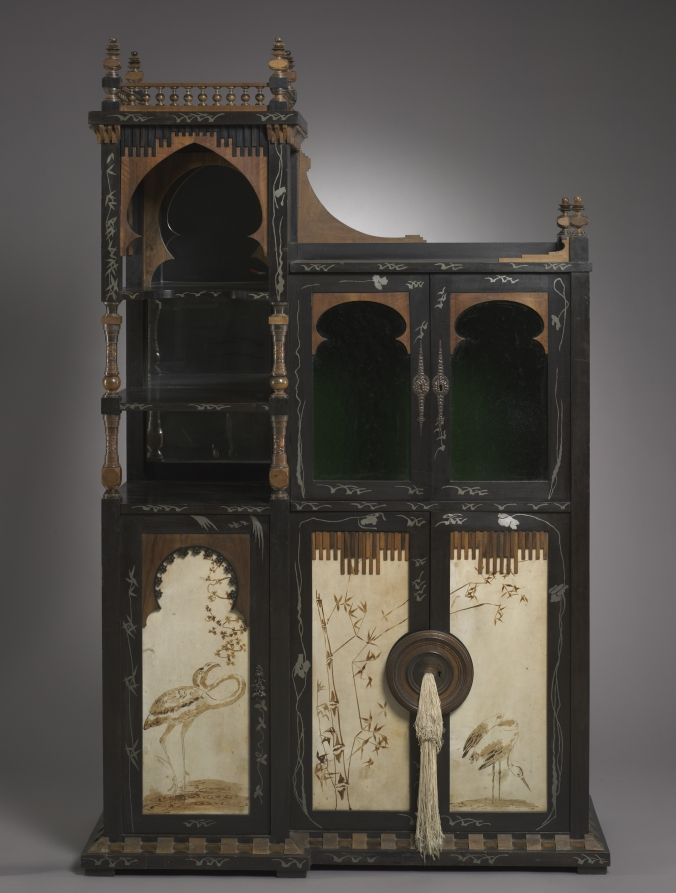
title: Cabinet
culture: France, late 19th Century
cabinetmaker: Carlo Bugatti (Italian, 1856–1940)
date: c. 1895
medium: wood with metal inlays and painted parchment, glass doors and mirror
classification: Furniture and woodwork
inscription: vellum panel on right side at the bottom signed in pseudo Japanese letters: "Casati. (No professional artist of this name has been discovered; may be the work of the society woman, the Marchese Casati.)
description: In both form and decoration this cabinet typifies the work of Carlo Bugatti. Asymmetrical, with a tower-like element at one side, there are Islamic-inspired ornaments throughout its design, notably the onion-shaped arches in the upper half of the cabinet. Japanese influence is also evident in the white metal inlays and in the sepia-painted parchment panels. The cabinet displays an extensive vocabulary of other decorative devices, including the partial ebonized frame, the turned wooden ornaments, metal reliefs, mirrored and green glass, and silk tassels. Despite their diversity, Bugatti organized all these elements into a coherent design.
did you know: Carlo Bugatti's sons achieved illustrious careers of their own. Rembrandt Bugatti (1884-1916) became a celebrated sculptor, and Ettore Bugatti (1881-1947) manufactured luxurious automobiles and racing cars.